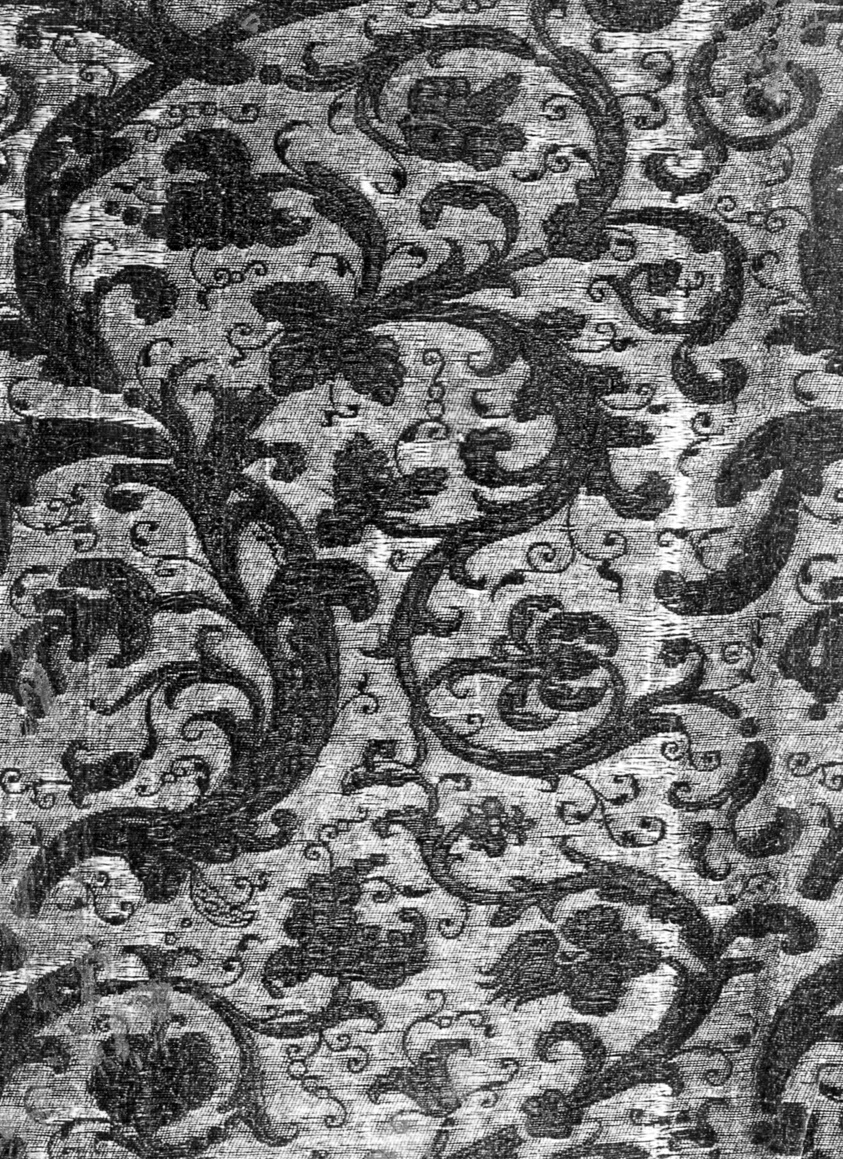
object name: Textile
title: Fragment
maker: Italy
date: 16th/17th century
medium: silk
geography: Italy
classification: textile; weaving